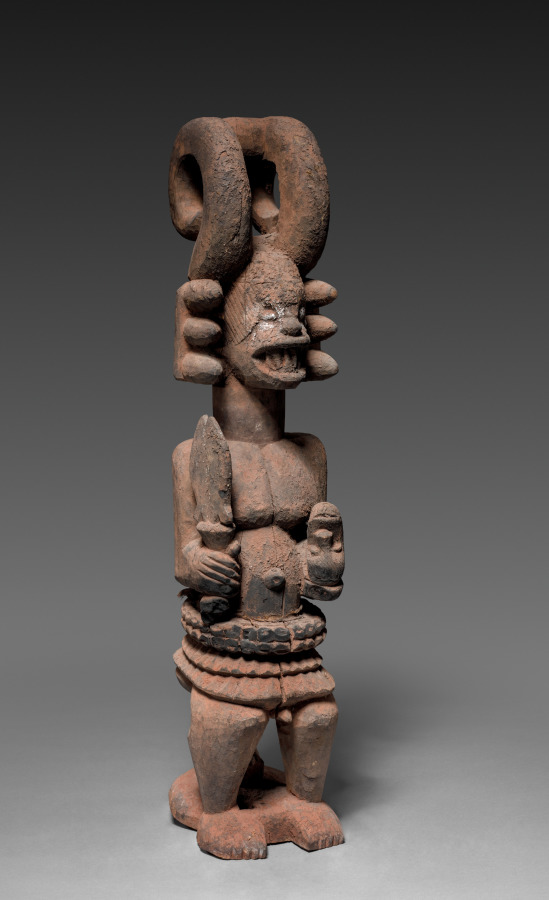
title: Shrine Figure (Ikenga)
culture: Africa, West Africa, Nigeria, Igbo carver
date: possibly early 1900s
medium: Wood, organic materials, and raffia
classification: Sculpture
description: This seated figure of a man holding a cutlass and an inverted human skull is a cult object called ikenga, associated with achievement and success. Standing at the center of a man’s personal shrine, the sculpture receives prayers and sacrifices in return for the ancestors’ guidance. An elaborate headdress comprising two horn-like extensions reinforces the cult’s preoccupation with masculinity, while facial incisions known as ichi refer to membership in one of many male associations.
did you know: This figure associated with achievement and success would have received prayers and sacrifices in return for the guidance of ancestors.